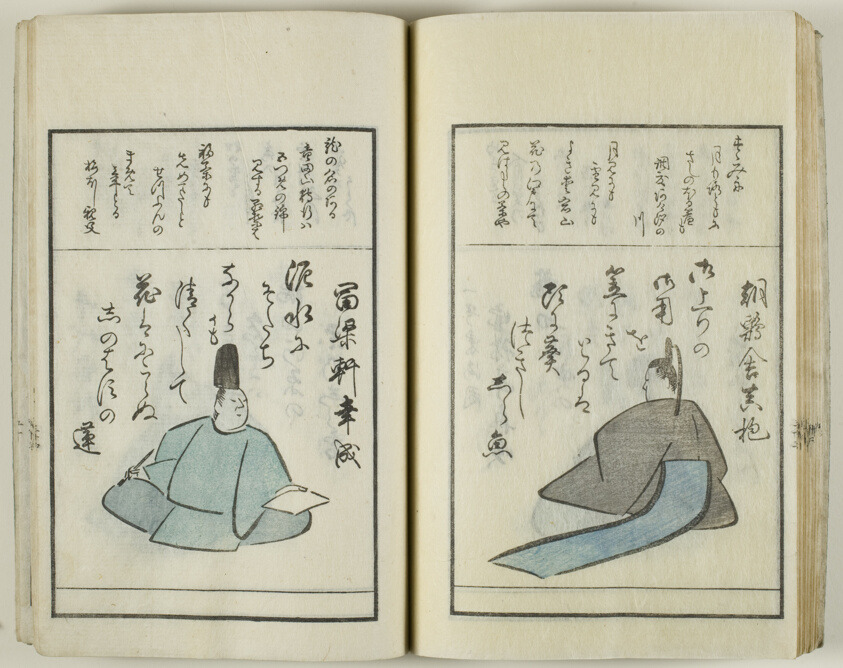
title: Kyoka hyakunin isshu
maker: Utagawa Hiroshige (1797-1858); Japanese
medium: Woodblock printed book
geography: Japan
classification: book; asian art